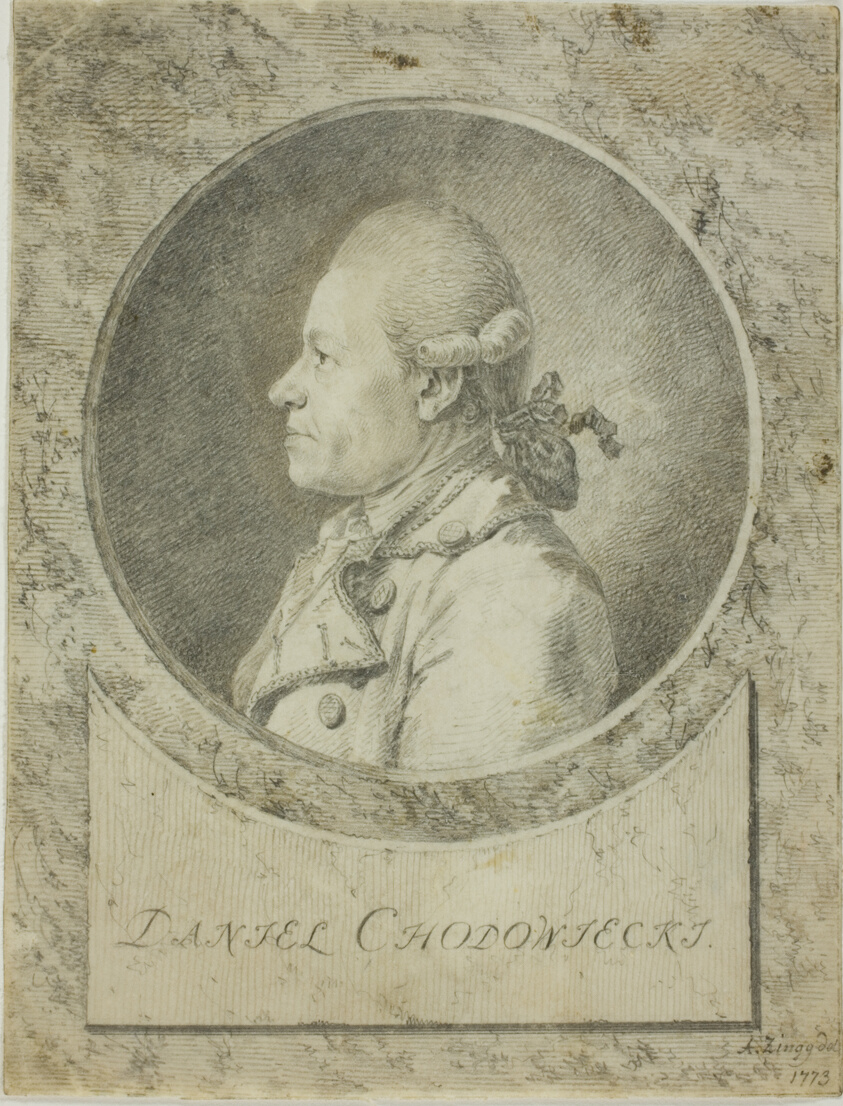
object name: Drawing and Watercolor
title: Profile of Daniel Chodowiecki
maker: Adrian Zingg (Swiss, 1734-1816)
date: 1773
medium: Graphite on vellum, laid down on ivory wove paper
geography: Switzerland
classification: graphite; drawings (visual works); prints and drawing